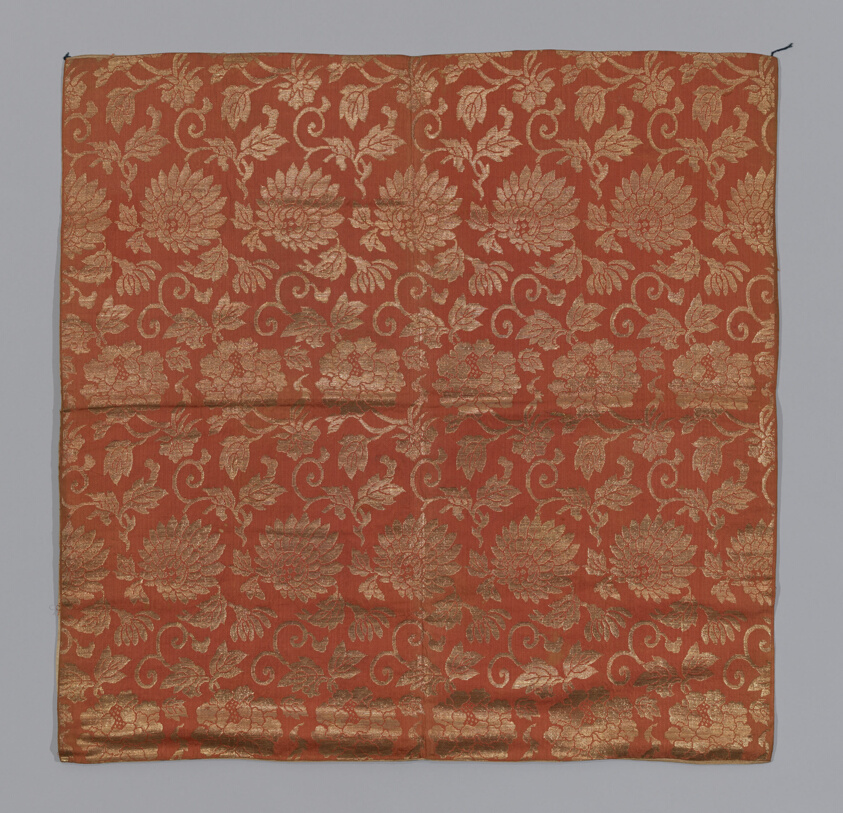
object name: Religious/Ritual Object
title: Uchishiki (Altar Cloth)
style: Japanism, edo (japanese period)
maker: Japan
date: Edo period (1615–1868), 1801/25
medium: Square piece of kinran, plain compound silk of orange-brown ground with pattern woven in gilded paper strips finely cut, representing chrysanthemum and peony scrolls, lined with white linen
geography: Japan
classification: textile; weaving; liturgical; ritual objects